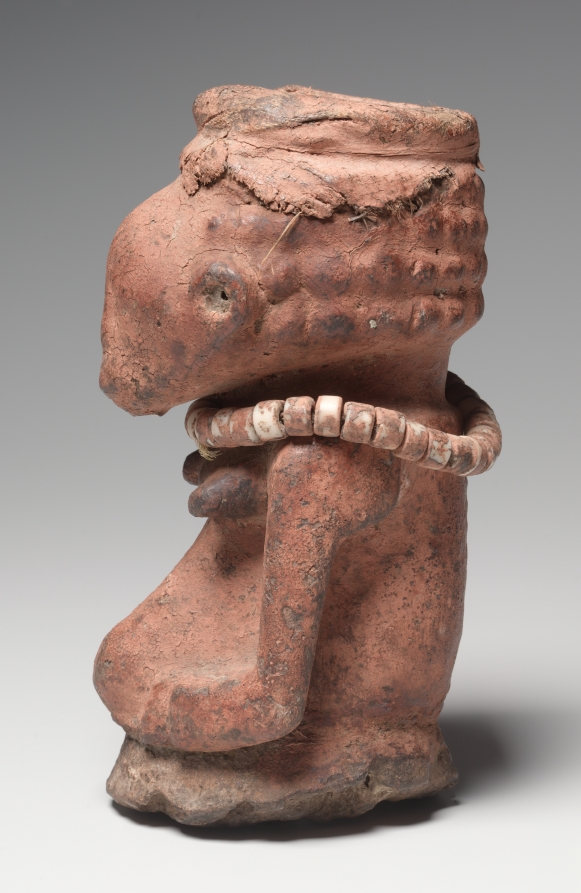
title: Figure (Nkishi)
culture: Africa, Central Africa, Democratic Republic of Congo, Luba-style maker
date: late 1800s–early 1900s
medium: Wood, organic materials (including resin and soil), plant fiber, and glass beads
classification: Sculpture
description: The substances contained in its cloth-covered cranial cavity indicate that this half-figure belongs to the broad category of charms or “power objects” that the Luba call mankishi. It was used by a ritual expert and functioned in a variety of rituals dealing with healing, protection, divination, or jurisdiction. Often such power figures were carved by the ritual experts rather than by professional artists.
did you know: Unlike most Luba arts, this figure is not connected to the royal court.